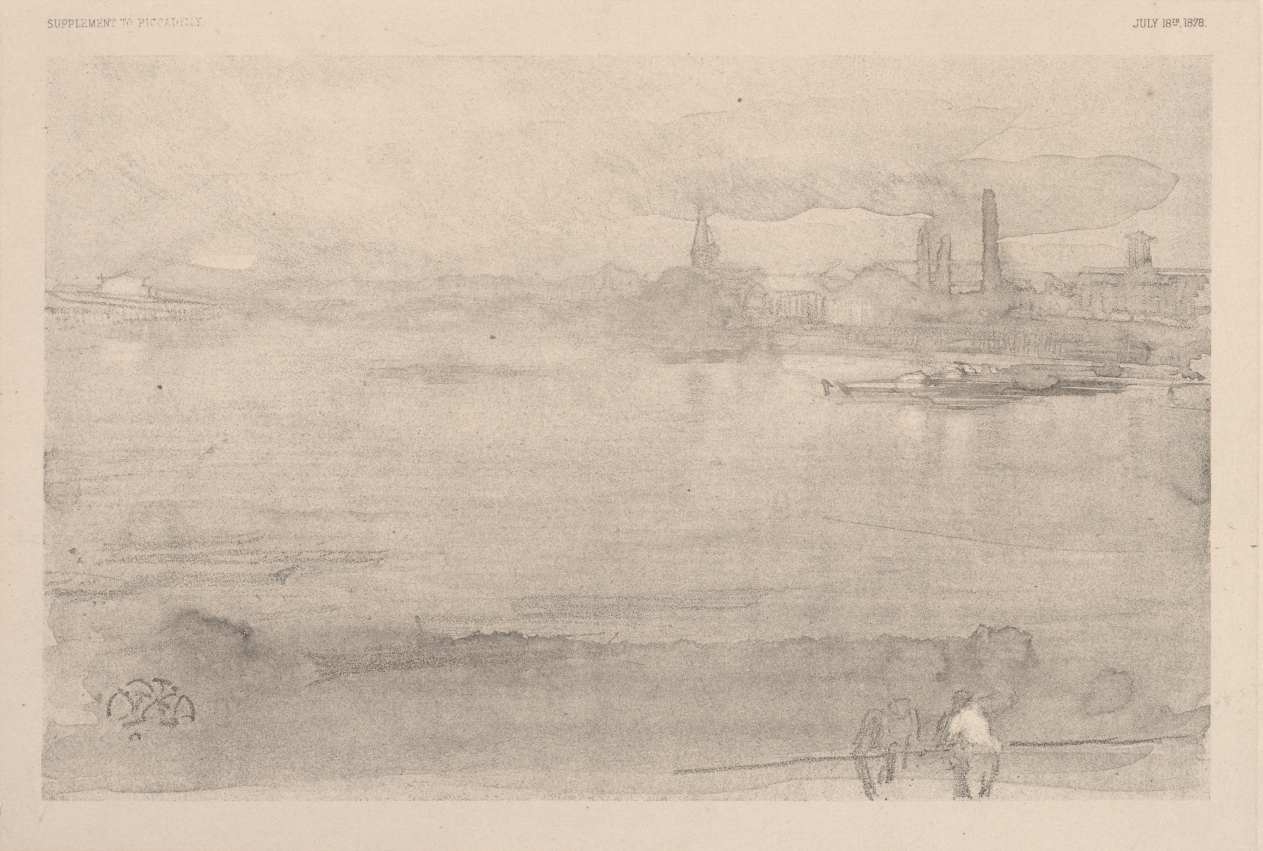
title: Early Morning: The Thames at Battersea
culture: America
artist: James McNeill Whistler (American, 1834–1903)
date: 1878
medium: lithograph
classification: Print